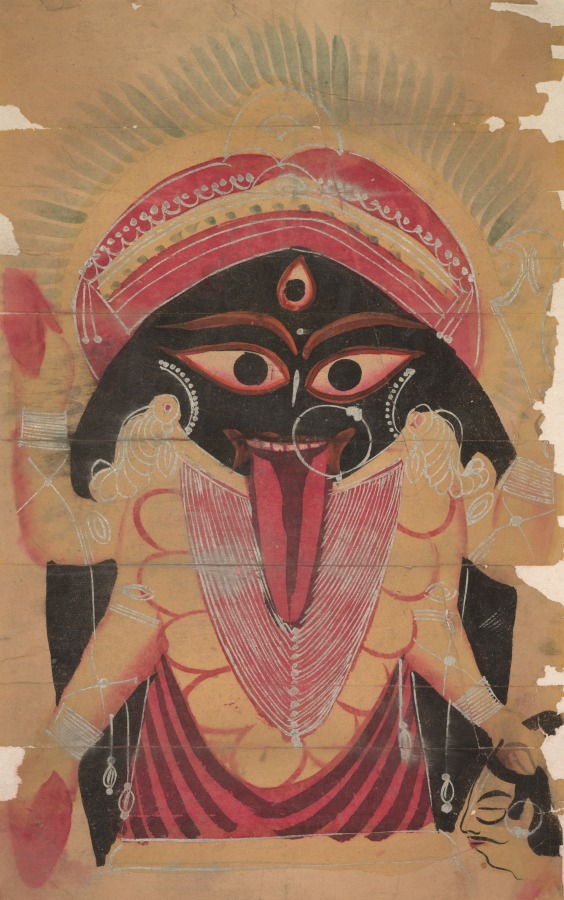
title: Kali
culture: Eastern India, Bengal, Kolkata, Kalighat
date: c. 1890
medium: Gum tempera, graphite, and ink on paper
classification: Painting